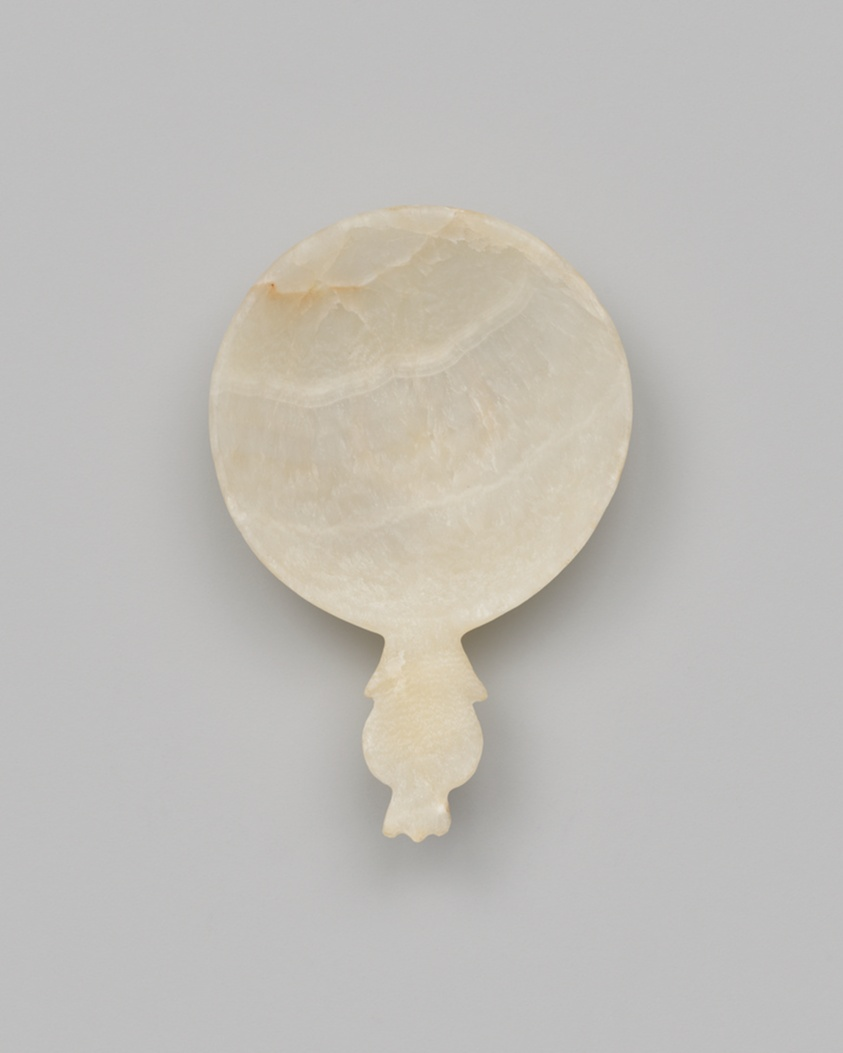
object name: Vessel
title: Ointment Vessel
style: new kingdom, ancient, egyptian, eighteenth dynasty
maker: Egyptian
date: New Kingdom, Dynasty 18 (about 1550-1295 BCE)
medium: Travertine (Egyptian alabaster)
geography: Egypt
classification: personal grooming / hygiene / cosmetic container; stone; vessel; ancient art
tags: pomegranates, beauty, rituals